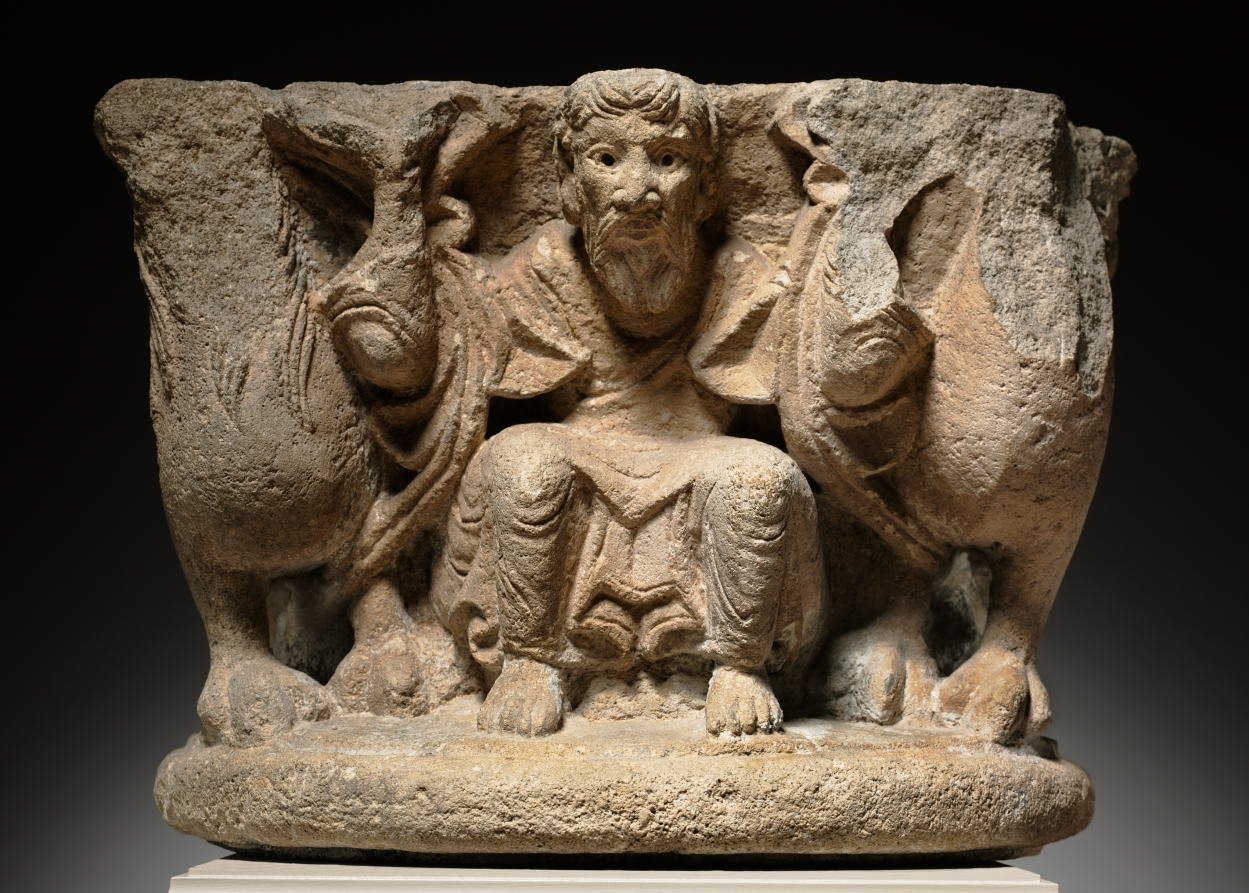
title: Engaged Capital with a Supporting (Caryatidal) Figure Flanked by Lions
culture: Western France, Vendée or Angoulême?, 12th century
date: c. 1125–1150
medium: limestone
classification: Sculpture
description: This sculpture is an excellent example of the Romanesque sculptor’s ability to accommodate his subject to the format of the capital. Much of the artistic quality of this work derives from the skillful contrast and balance of rounded solids, deep voids, and shallow prismatic hollows. It also illustrates the love of fanciful subject matter in largely religious contexts. A capital is essentially the top element of a column, usually carved, that acts as a mediator between the column and the load it supports. In this way, the subject of this capital serves as a metaphor.